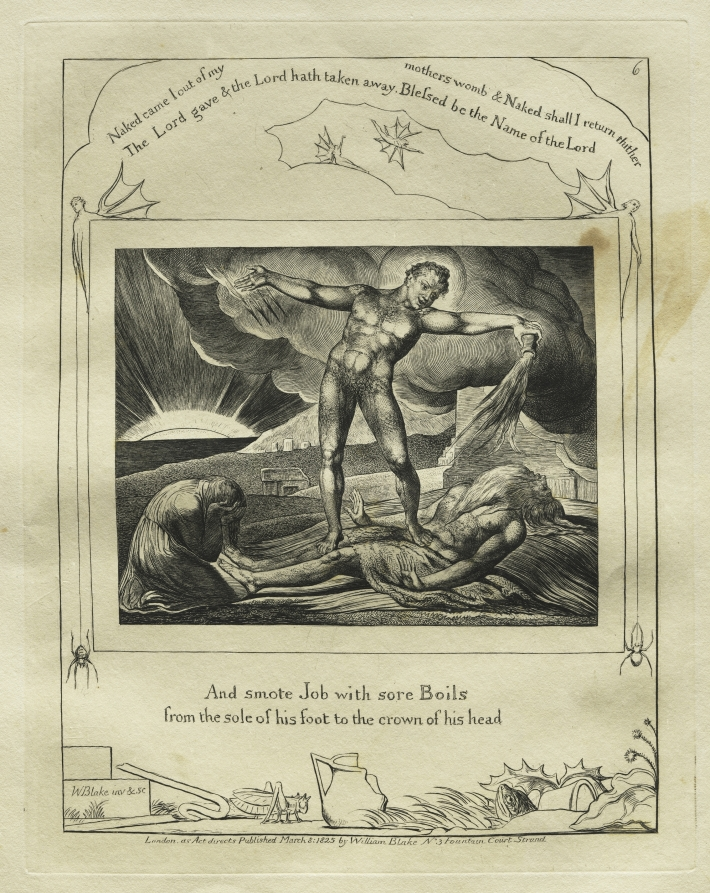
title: The Book of Job: Pl. 6, And smote Job with sore Boils / from the sole of his foot to the crown of his head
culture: England, 19th century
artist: William Blake (British, 1757–1827)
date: 1825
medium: engraving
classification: Print